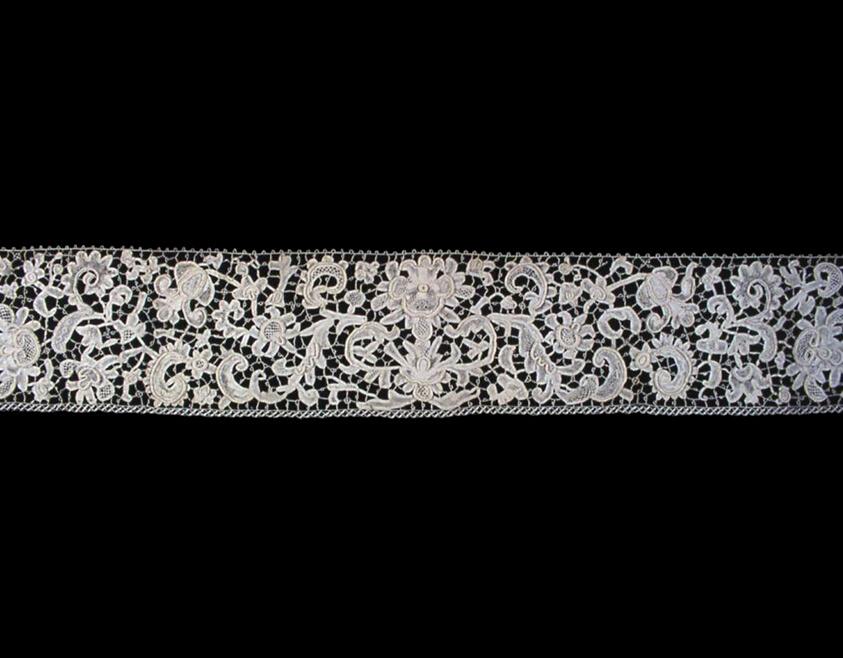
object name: Textile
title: Border (From a Cover)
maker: England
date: c. 1700 (based on Venetian laces)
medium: Linen, needle lace with woven tapes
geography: England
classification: textile; lace - mixed